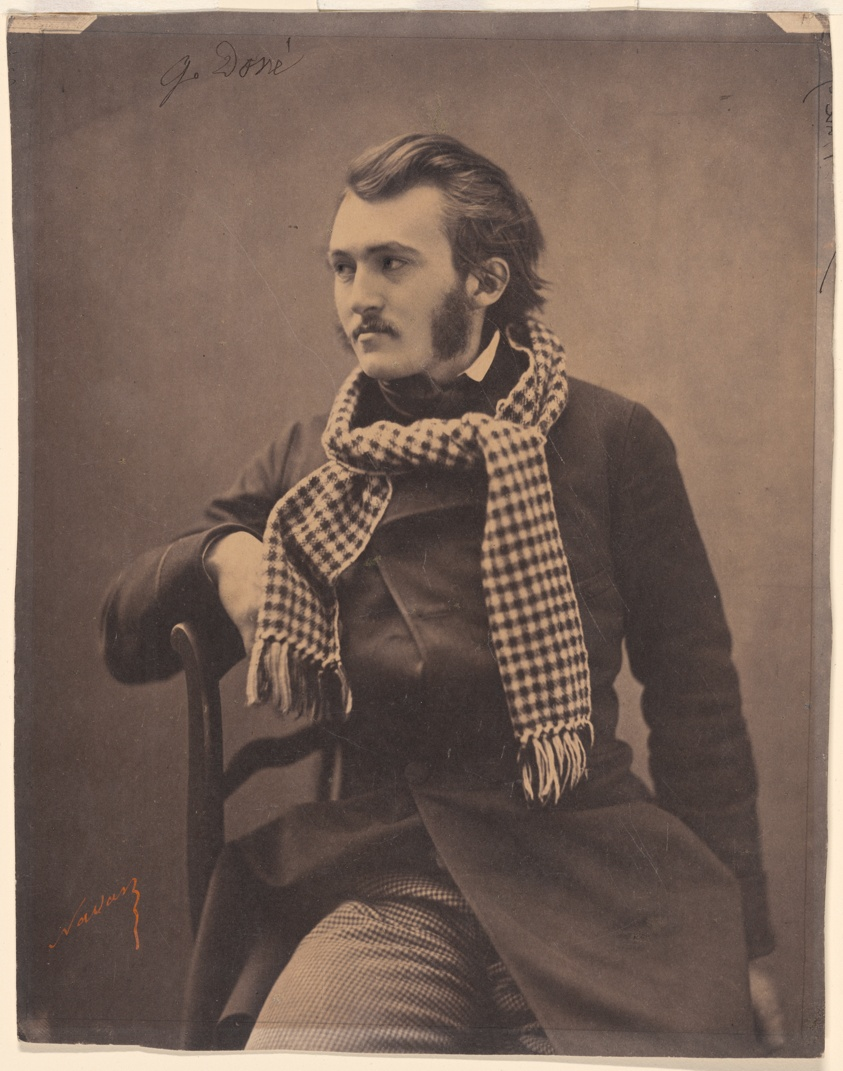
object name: Photograph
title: Gustave Doré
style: 19th century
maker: Nadar (Gaspard Félix Tournachon) (French, 1820–1910)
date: 1856-58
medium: Albumen print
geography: France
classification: albumen silver print; photographic process; photography; photograph